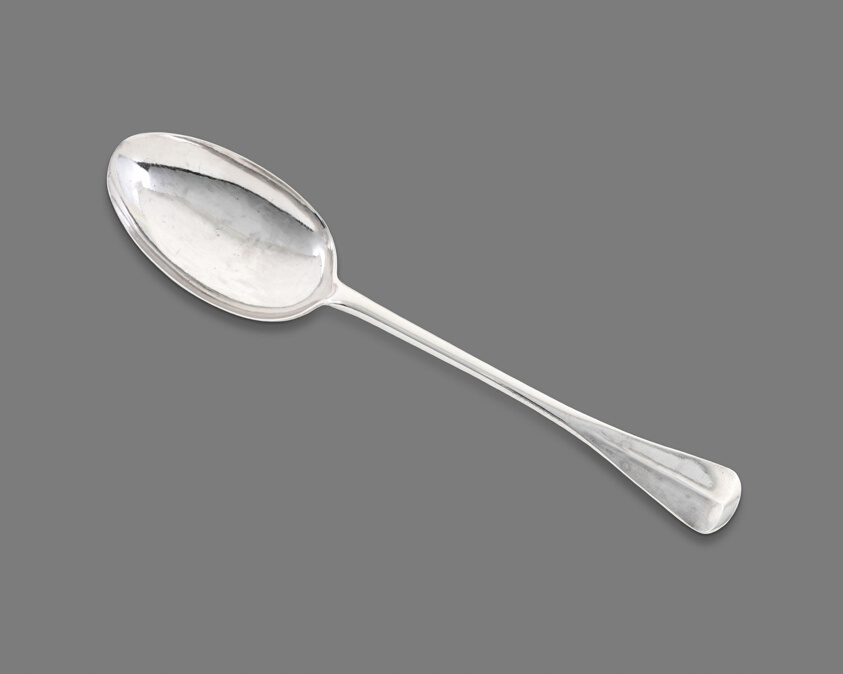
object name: Metalwork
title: Spoon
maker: Artist unknown (American, 18th century)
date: 1750–75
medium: Silver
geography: United States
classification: spoon; silver; utensil; american decorative arts; american arts; decorative arts